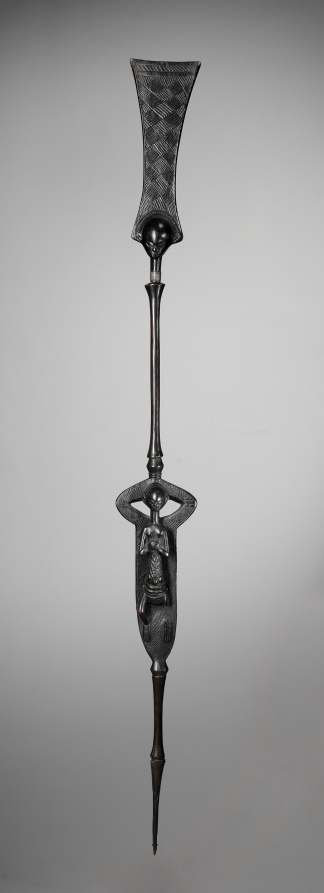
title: Staff of Office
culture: Central Africa, Democratic Republic of the Congo, Luba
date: early to mid-1800s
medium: Wood and iron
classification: Sculpture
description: Sanctified by a ritual specialist and enhanced with medicinal substances, the staff possessed supernatural qualities and was endowed with healing power. Luba staffs are among the most important regalia of Luba kings. The metal point alludes to the kingdom's stability and durability. Each staff has its own distinctive iconography to reflect regional styles. As Chief Msidi (former owner of this staff) ruled over the Yeke kingdom (and not the Luba kingdom), it begs the question of how he acquired this symbol of another realm's power.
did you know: The Yeke kingdom ruler Chief Msidi gave this as a gift of appreciation to the British missionary Frederick Stanley Arnot, whom the chief had invited to his kingdom.